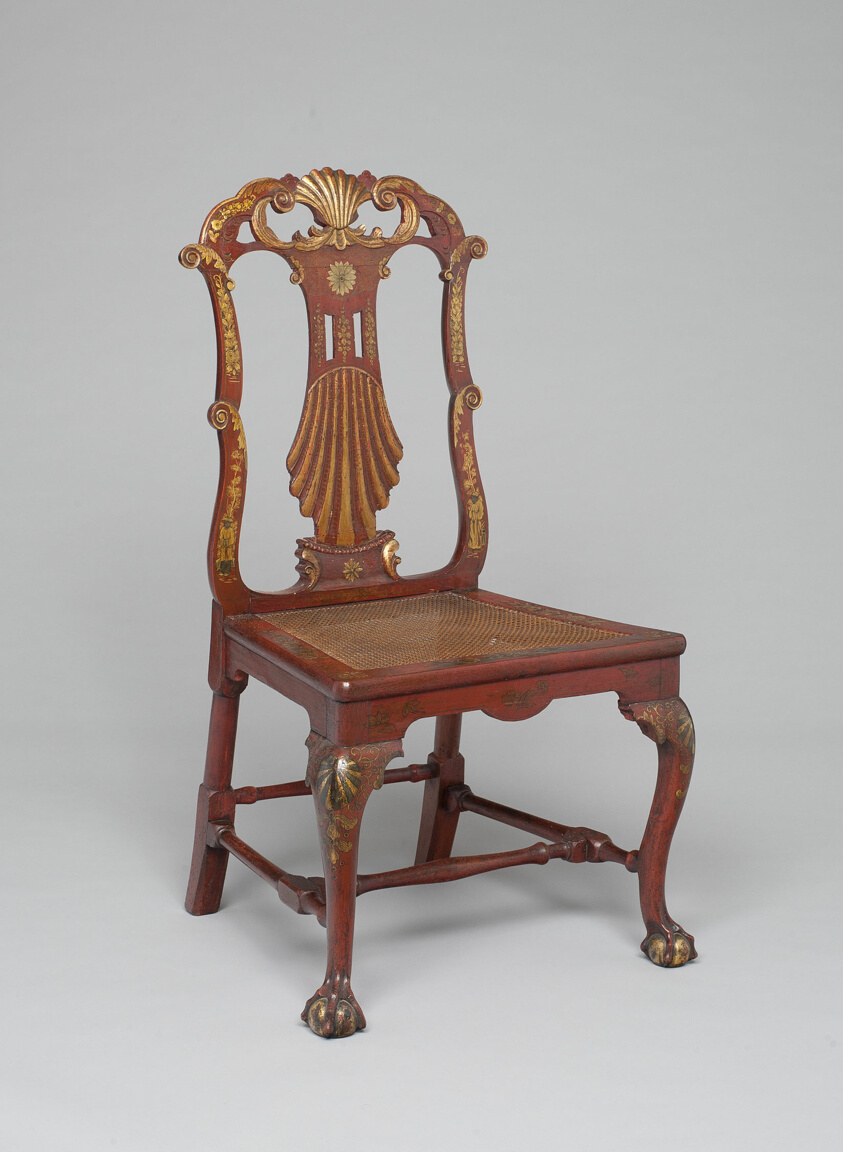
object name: Furniture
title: Chair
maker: Attributed to Giles Grendey (English, 1693–1780); England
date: c. 1735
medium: Wood with red and gold lacquer decoration and caned seat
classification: chair; seating; furniture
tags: furniture